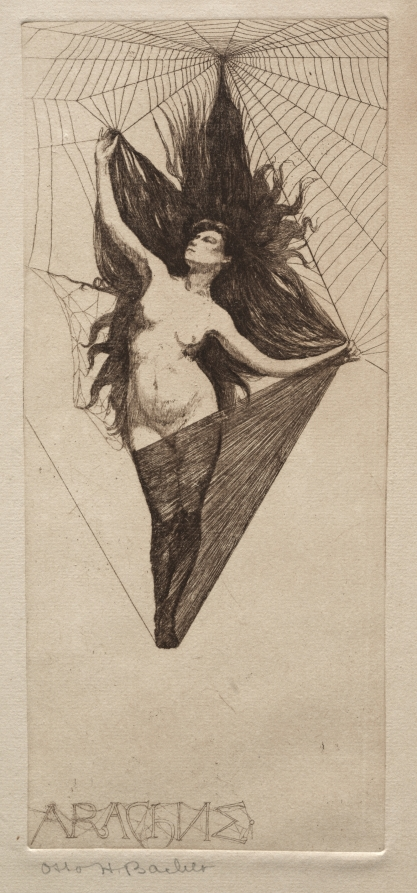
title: Arachne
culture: America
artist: Otto H. Bacher (American, 1856–1909)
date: 1884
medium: etching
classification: Print